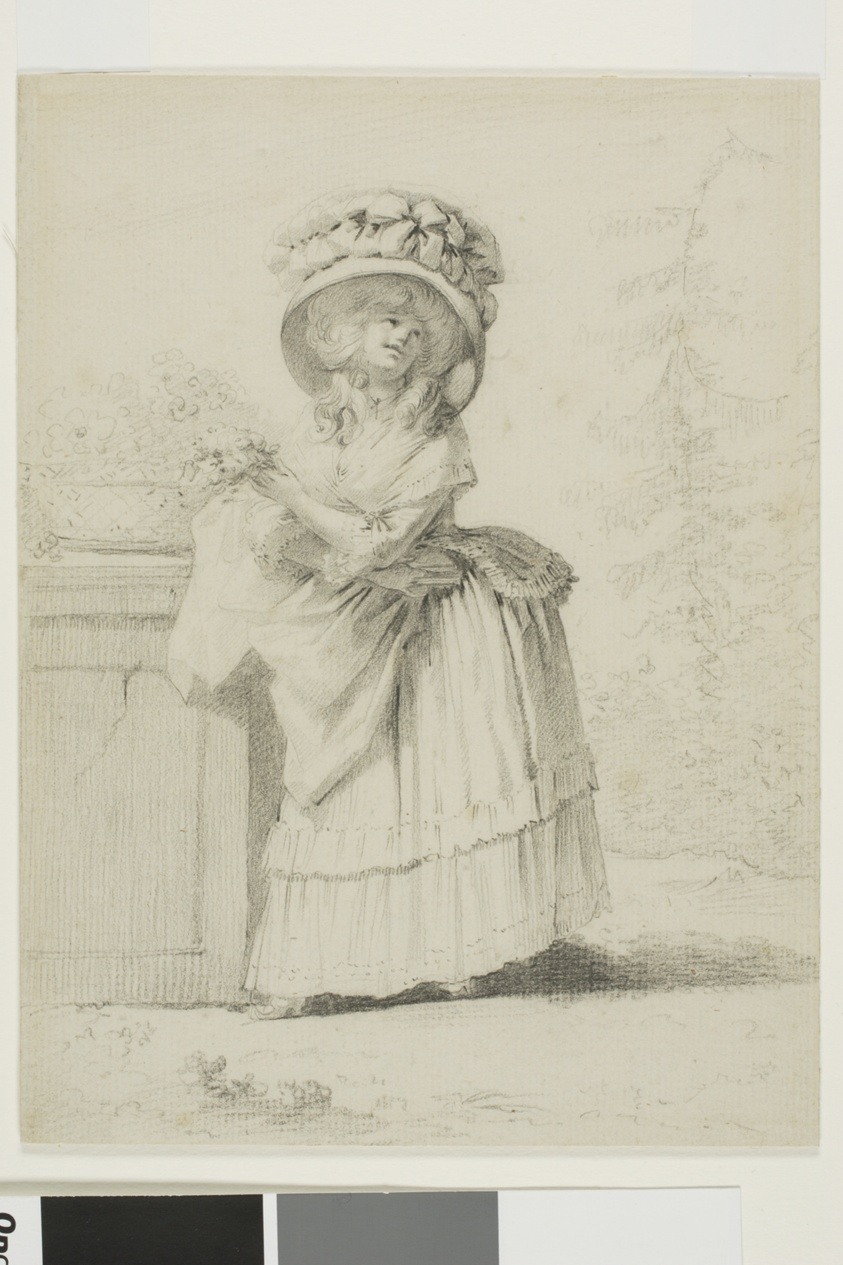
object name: Drawing and Watercolor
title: An Elegant Young Woman in a Garden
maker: Alexandre Moitte (French, 1750-1828)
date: c. 1785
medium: Black chalk on ivory laid paper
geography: France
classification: graphite; drawings (visual works); prints and drawing